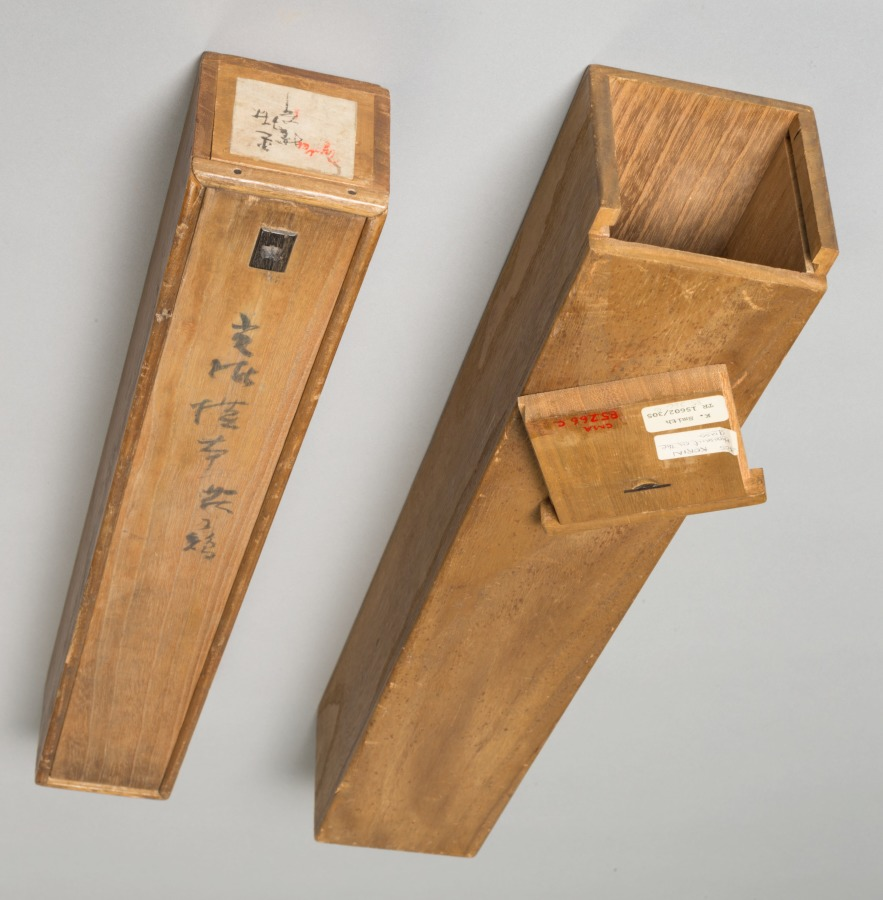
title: Pheasant and Grasses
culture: Japan, Edo period (1615–1868)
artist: attributed to Ogata Kōrin (Japanese, 1658–1716)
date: late 1600s–early 1700s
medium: hanging scroll; ink and color on paper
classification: Painting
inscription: two seals of artist, lower right.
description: Korin was a founder of the Rimpa (decorative) school of painting and was a keen observer of nature. The pheasant is often associated with autumn.